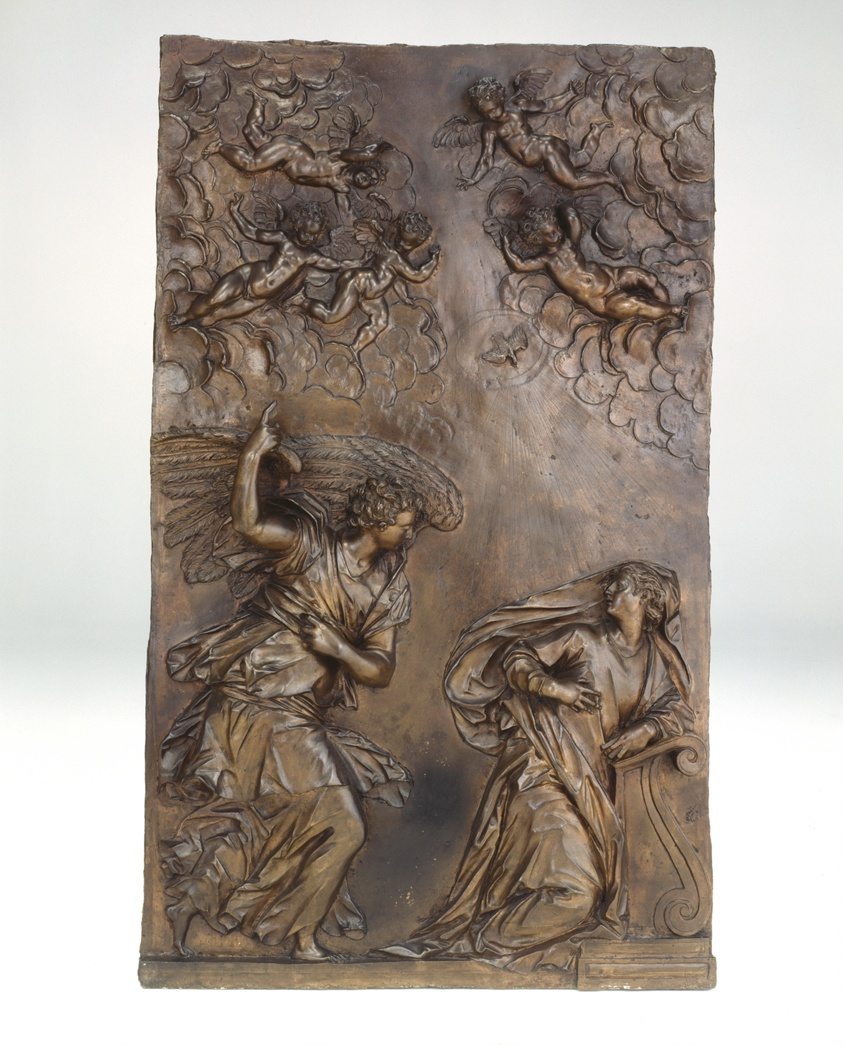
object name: Sculpture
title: The Annunciation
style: Renaissance, 16th Century, sixteenth century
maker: Alessandro Vittoria (Italian, 1525–1608)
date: c. 1583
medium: Bronze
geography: Venice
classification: relief; sculpture; bronze; Italian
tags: religion, wings, clouds, mythological figures, Christianity, biblical, Christian subjects, angels, Virgin Mary, Devotion, religious, religious figures, religious scenes